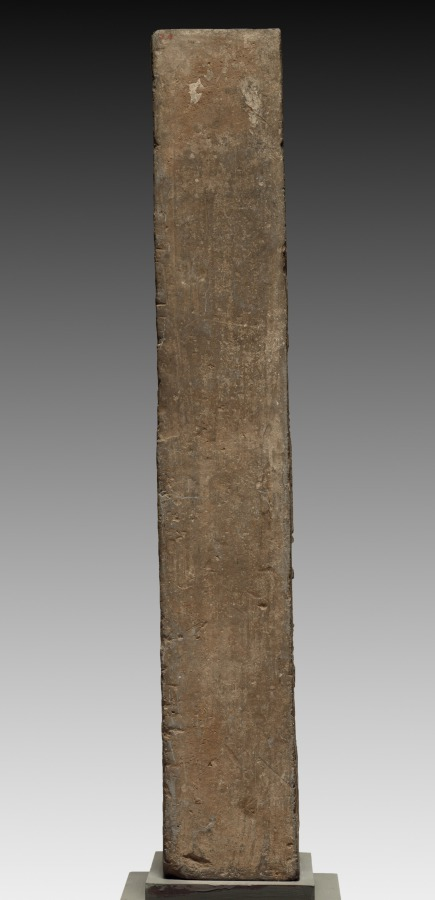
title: Hollow Tile: Column from Tomb-Chamber Doorway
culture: China, Han dynasty (202 BCE–220 CE)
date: 100–200 CE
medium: earthenware, die-stamped relief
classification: Ceramic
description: Striding tigers (top), racing horsemen (right column), and reverent officials (left column) are stamped into the surface of this underground portal to a tomb. The doorway preserves in stone the post-and-lintel structure, a basic element of Chinese wooden architecture. By the first century AD, a revolution in Chinese tomb construction and furnishing had taken place. Tombs lined with decorated bricks and tiles replace the earlier tombs constructed with only rammed earth-walls. Ceramic surrogates or models of stoves, houses, servants, and pets filled these more durable chambers, symbolically extending the creature comforts of this world into the world after death.